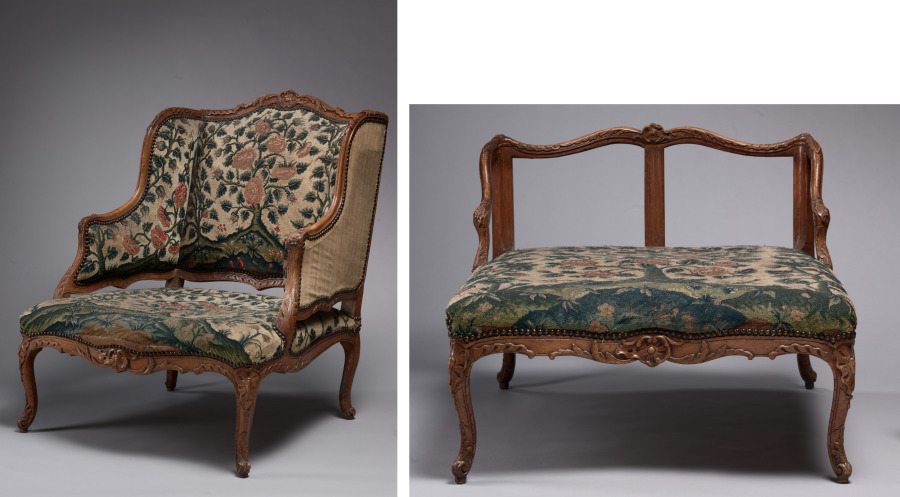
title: Daybed (Duchesse brisée)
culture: France, style of Louis XV, 20th century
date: c. 1890–1940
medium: carved wood frame upholstered in needlework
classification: Furniture and woodwork